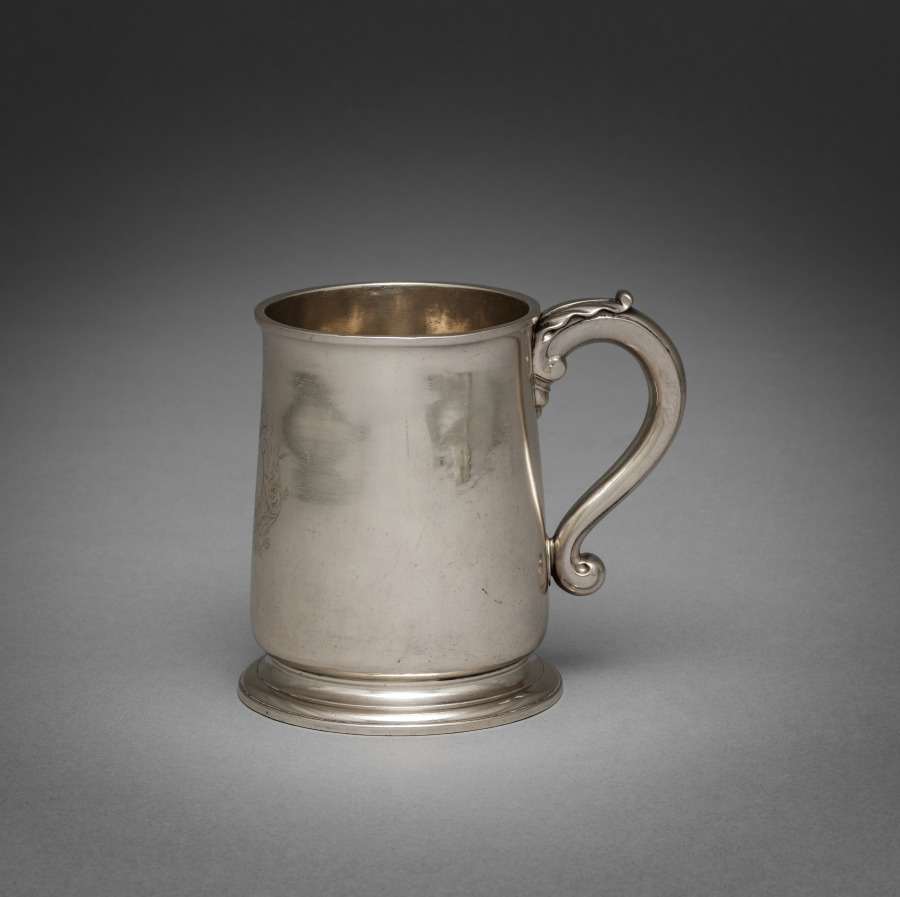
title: Cann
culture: England, 18th century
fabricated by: Paul Jacques de Lamerie (British, 1688–1751)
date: 1727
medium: silver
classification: Silver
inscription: engraved on front: crest of griffin's head erased and mantling in contemporary style. (This crest was widely used and therefore the first owner cannot be identified.)